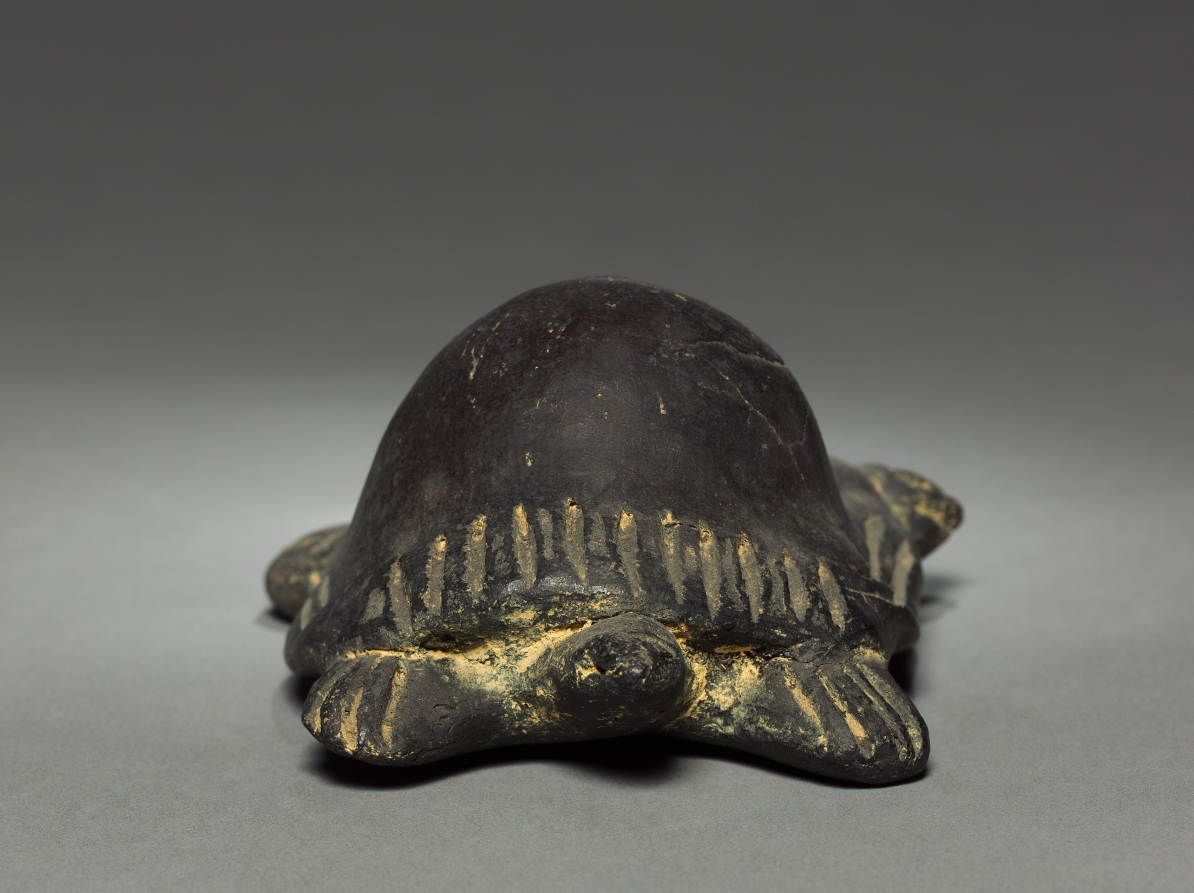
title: Turtle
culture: Colombia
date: before 1921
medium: pottery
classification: Ceramic